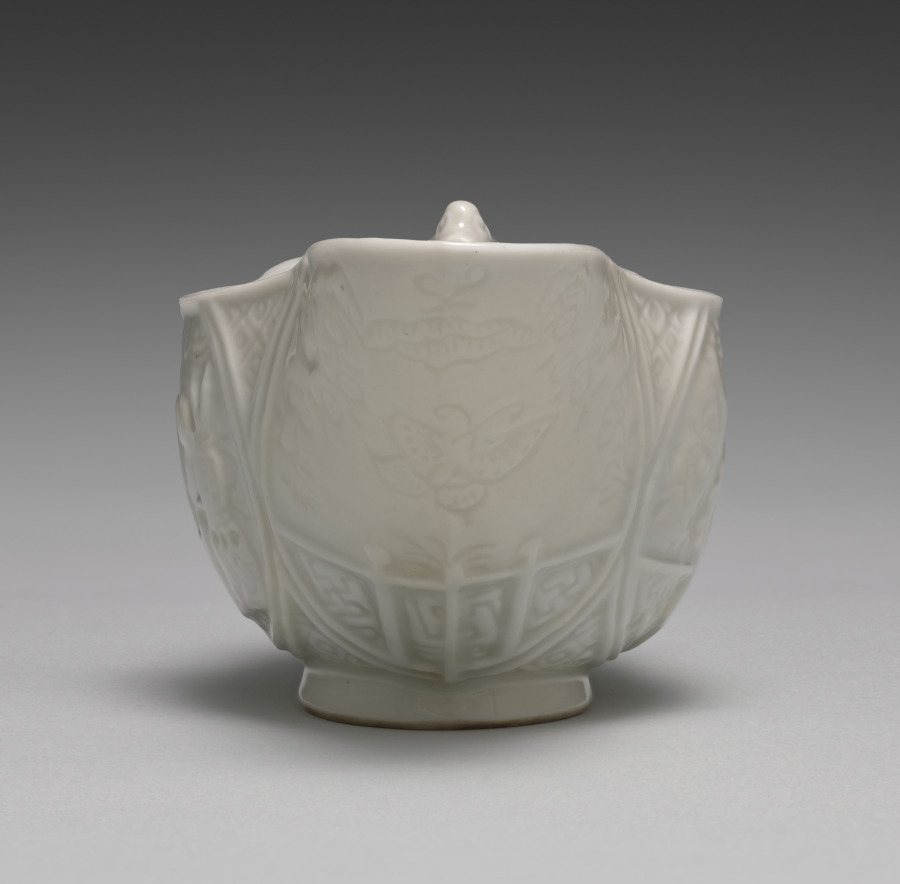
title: Water Cooler with Chinese Gardens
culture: Japan, Meiji period (1868–1912)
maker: Seifū Yohei III (Japanese, 1851–1914)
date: 1893–97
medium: Porcelain with molded and carved designs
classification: Ceramic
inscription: Artist's seal beneath the handle.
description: Unlike most pieces by the Seifu Yohei studio, this one bears a seal beneath the handle rather than on the base. The glaze and technique are identified on the box as taihakuji, or “great white porcelain,” an important early invention Yohei III devised in 1872 that involved the combination of a distinctive translucent, creamy glaze over an ivory-colored clay body. The body’s two sides have garden scenes seen through windows. Designs of flowers and butterflies are incised in the spaces at both ends. The garden on the right-hand side of the vessel, seen through a round window, has a decorative rock with grasses beneath a cloudy sky; and on a tiled veranda, there is a teapot as well as a fan and two scrolls inserted into a double-handled urn or kettle atop a brazier. The garden on the left-hand side has two enormous flowers below what may be either a cloud or a rippling pond; a garden rock—or perhaps a carved wood sculpture—with a circular perforation sits on what appears to be a veranda. While the details may be open to interpretation, the setting is a rather glamorous Chinese residence or palace with a superbly tended garden in spring or summer.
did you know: This water cooler has a handle with a dragon head.